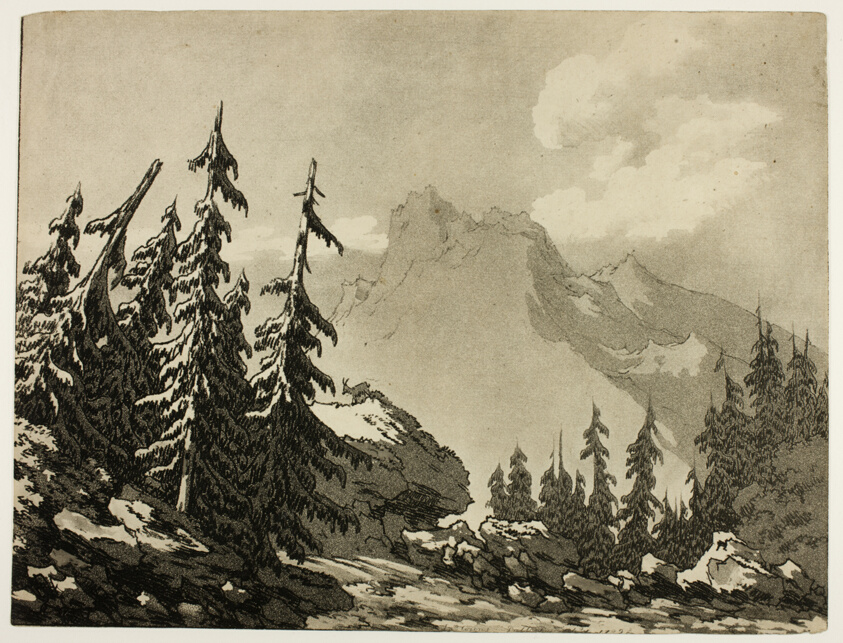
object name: Print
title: Pine Trees in the Mountains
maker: John Robert Cozens (English, 1752-1799)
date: 1789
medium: Aquatint and soft ground etching on cream wove paper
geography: England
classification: aquatint; print; prints and drawing